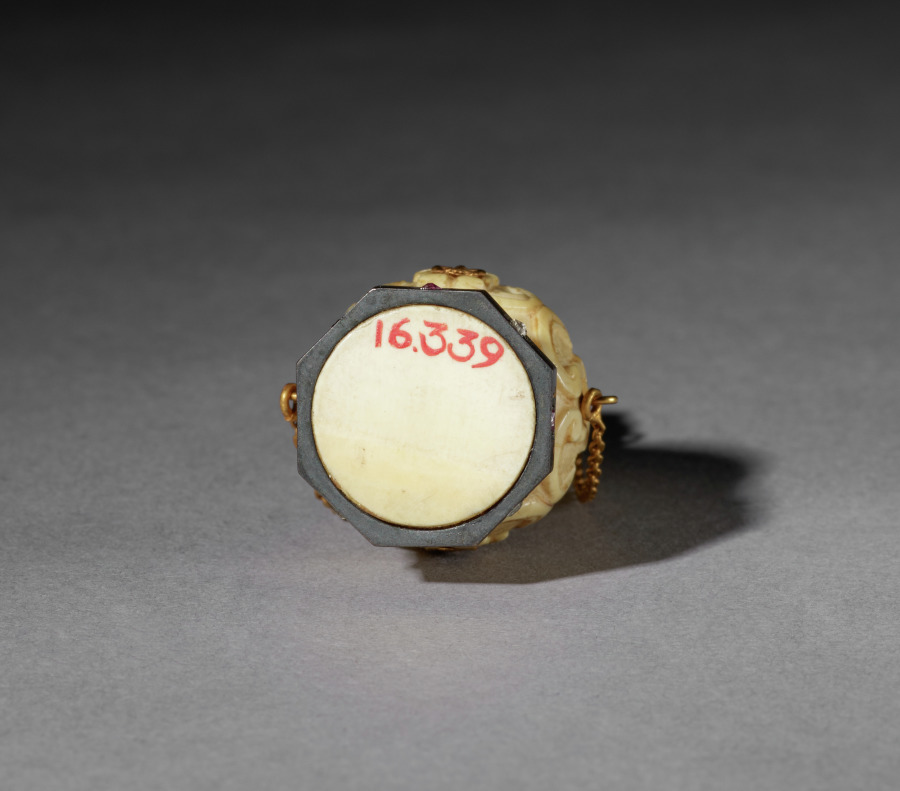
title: Scent Bottle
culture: Continental, mid-19th century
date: mid-1800s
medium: ivory with gold and silver mounts set with jewels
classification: Miscellaneous